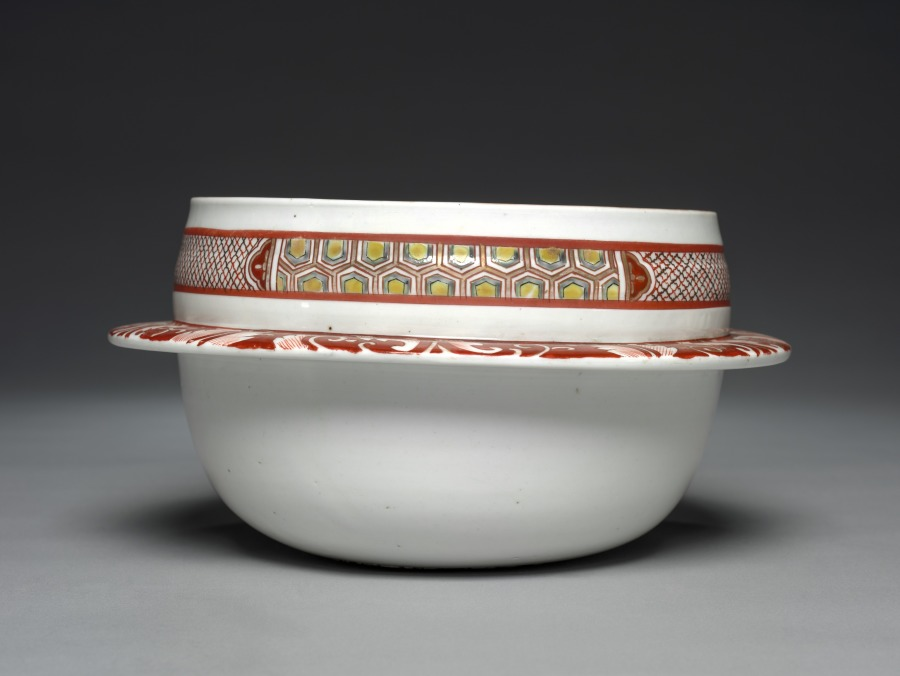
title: Rice Container: Ko Imari Type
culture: Japan, Edo period (1615–1868)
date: late 1600s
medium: porcelain with overglaze enamel and gold decoration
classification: Ceramic